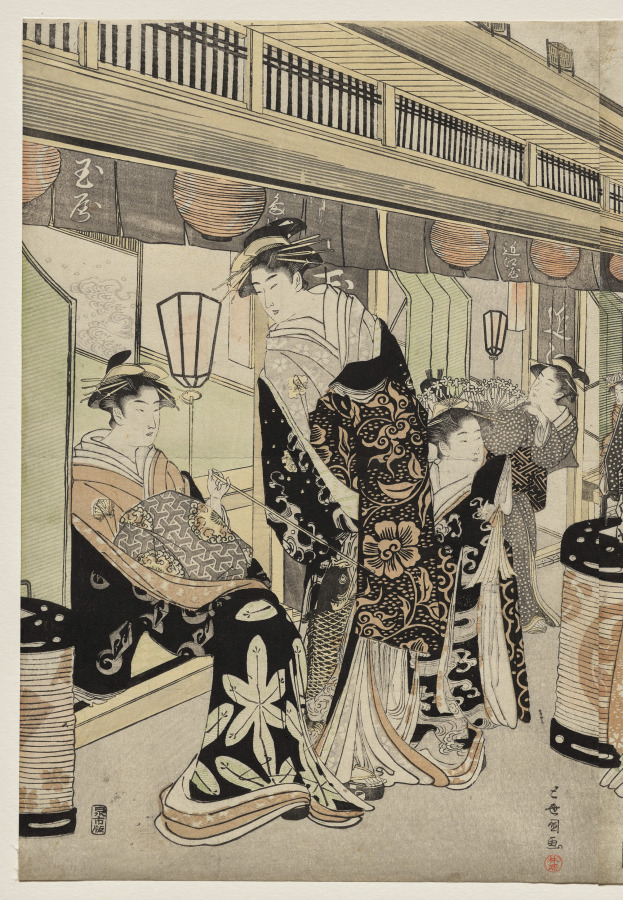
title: Courtesans Promenading on the Nakanochō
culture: Japan, Edo period (1615–1868)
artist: Utagawa Toyokuni (Japanese, 1769–1825)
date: c. 1790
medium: One of a triptych of color woodblock prints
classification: Print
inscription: Signature: Toyokuni ga Publisher: Izumiya Ichibei (Senichi han)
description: Nakanochō was the main street in Yoshiwara, a famous walled pleasure district that housed as many as 4,000 courtesans. In the early evening, elaborately dressed courtesans accompanied by attendants promenaded on the central thoroughfare, as in this scene. The open buildings with shop curtains hanging from their eaves are teahouses, establishments where men could arrange appointments with courtesans of the more prestigious brothels.